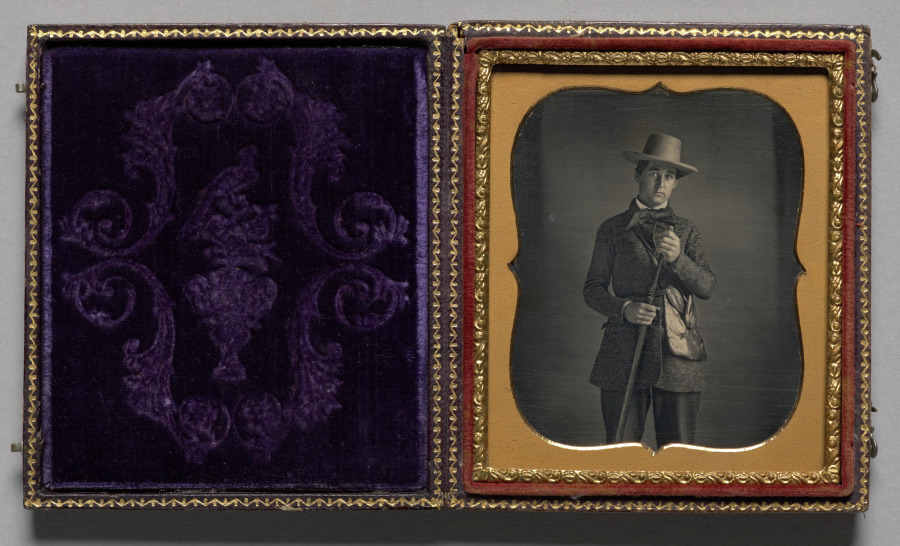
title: Hunter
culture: America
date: c. 1862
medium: daguerreotype, sixth plate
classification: Photograph